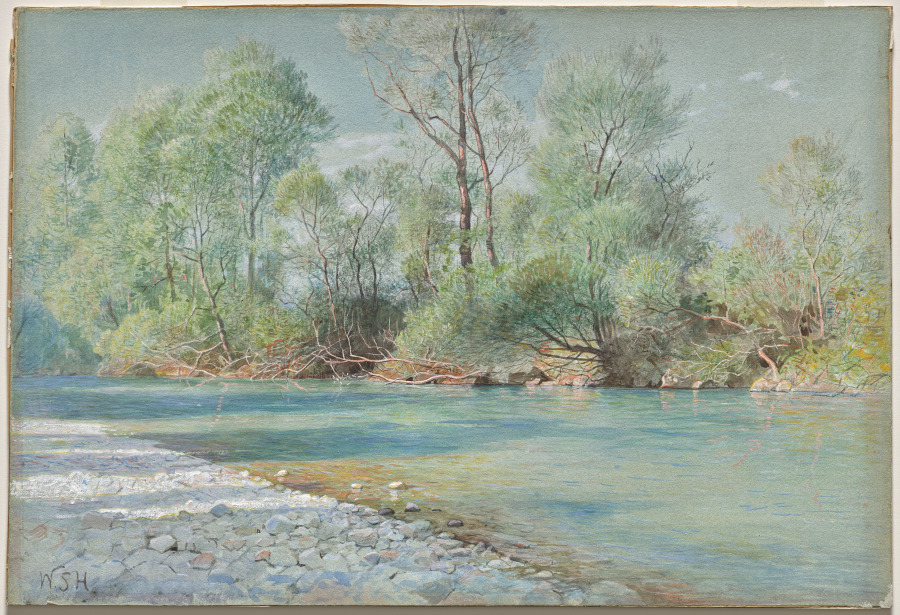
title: Traunstein River on the Road to Empfig, Bavaria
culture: American, 19th century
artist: William Stanley Haseltine (American, 1835–1900)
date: c. 1893–96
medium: Watercolor and gouache on blue paper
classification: Drawing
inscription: Initialed, lower left, in watercolor: WSH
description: In this watercolor, William Stanley Haseltine portrayed the calm shore of the Traunstein River, Bavaria, on a summer afternoon. A member of the Hudson River School and a practitioner of Luminism, Haseltine focused on atmosphere and reflection rather than a grand vista. His transparent washes and areas of opaque watercolor over blue paper create the effect of light skipping across the water.